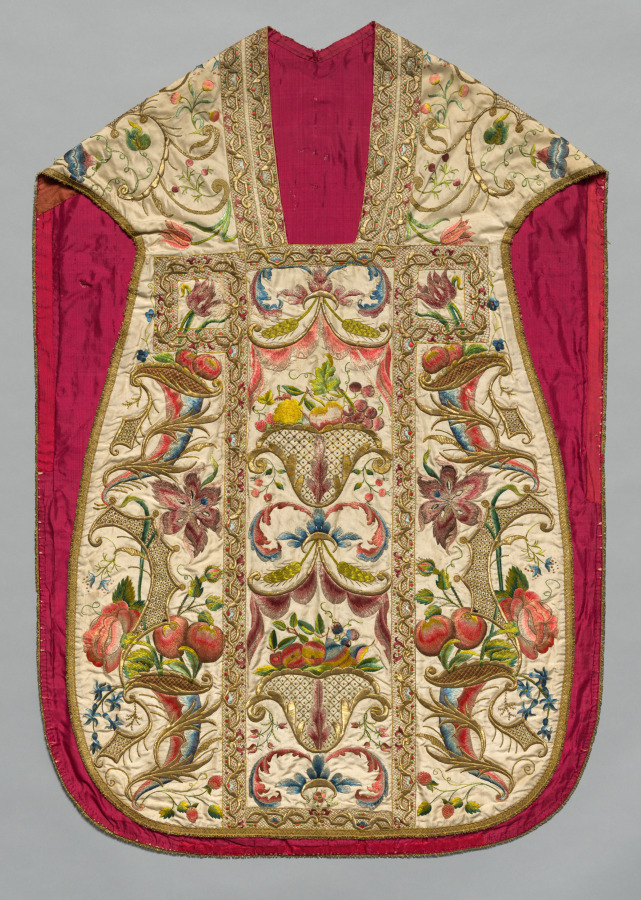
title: Chasuble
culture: Italy or Spain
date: 1700s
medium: Silk and metallic threads: embroidery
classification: Embroidery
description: The chasuble’s exquisite symmetrical decoration highlights its central panel where three illusionary gold containers hold skillfully shaded fruit in pastel silk tones. Delicately curving motifs enhance the side panels along with finely stitched strawberries in so-called French knots. This liturgical chasuble and other vestments, worn over a white alb with lace, were embroidered by professional specialists, such as experts who shaded colored silks or secured gold thread, in early versions of assembly lines that were usually in secular workrooms or in convents. The church or commissioner supplied the raw materials and paid a fee for the work.